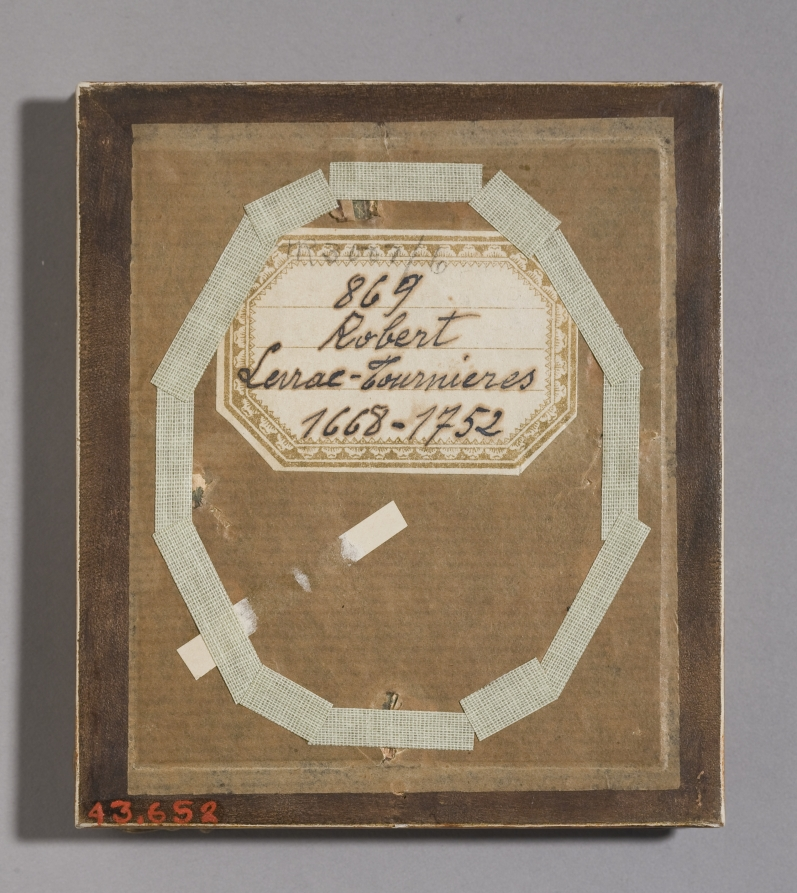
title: Portrait of Robert Levrac-Tournières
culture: France, 18th century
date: 1705–1710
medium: oil on copper in a gold and diamond frame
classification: Portrait Miniature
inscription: annotated on back: 869 Robert Lerrac- Tournieres 1668-1752